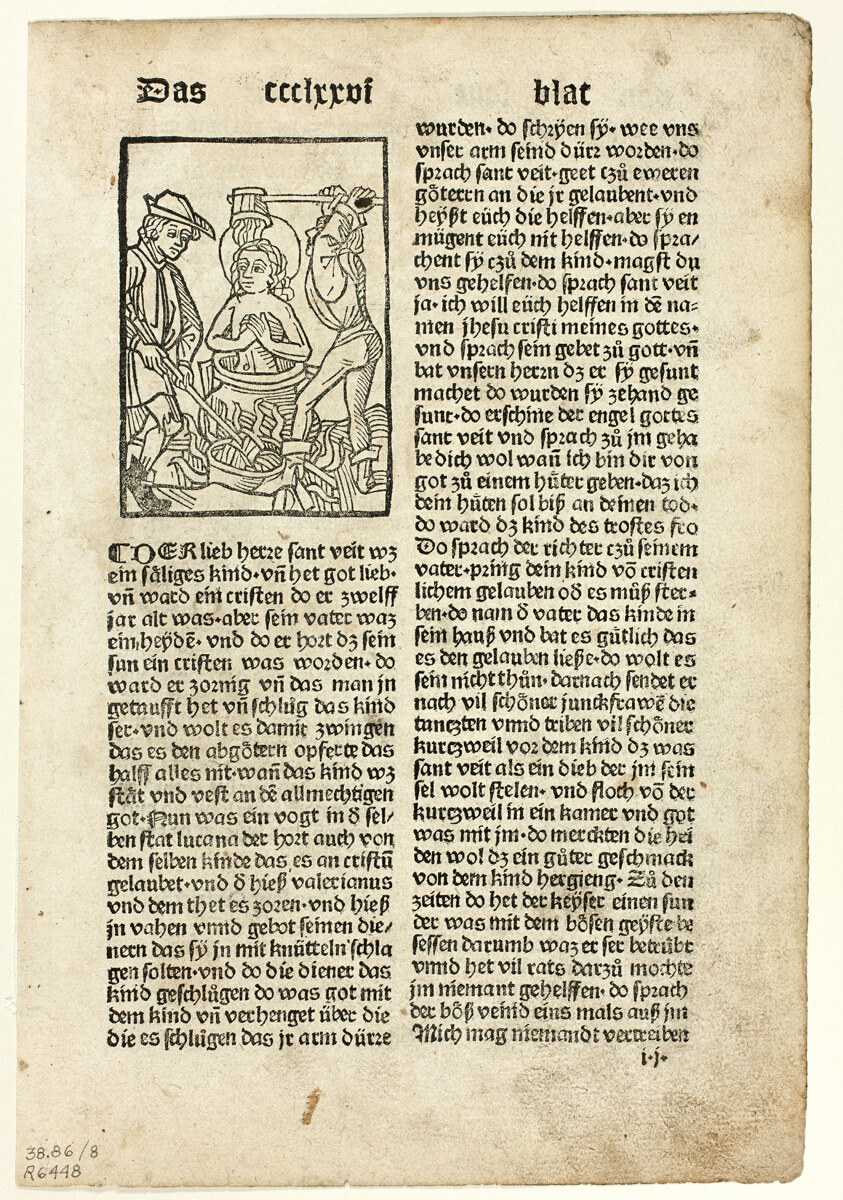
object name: Print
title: Saint Quiriaco from Heiligenleben (Lives of the Saints), Plate 8 from Woodcuts from Books of the 15th Century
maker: Unknown Artist (Augsburg, 15th century); printed and published by Johann Schönsperger the Elder (German, c. 1455–1521); original text by Jacobus de Voragine (Italian, c. 1230–1298); portfolio text by Wilhelm Ludwig Schreiber (German, 1855–1932)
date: 1489, portfolio assembled 1929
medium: Woodcut in black, and letterpress in black (recto and verso), on buff laid paper, tipped onto cream wove paper mat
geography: Germany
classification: woodcut; print; prints and drawing